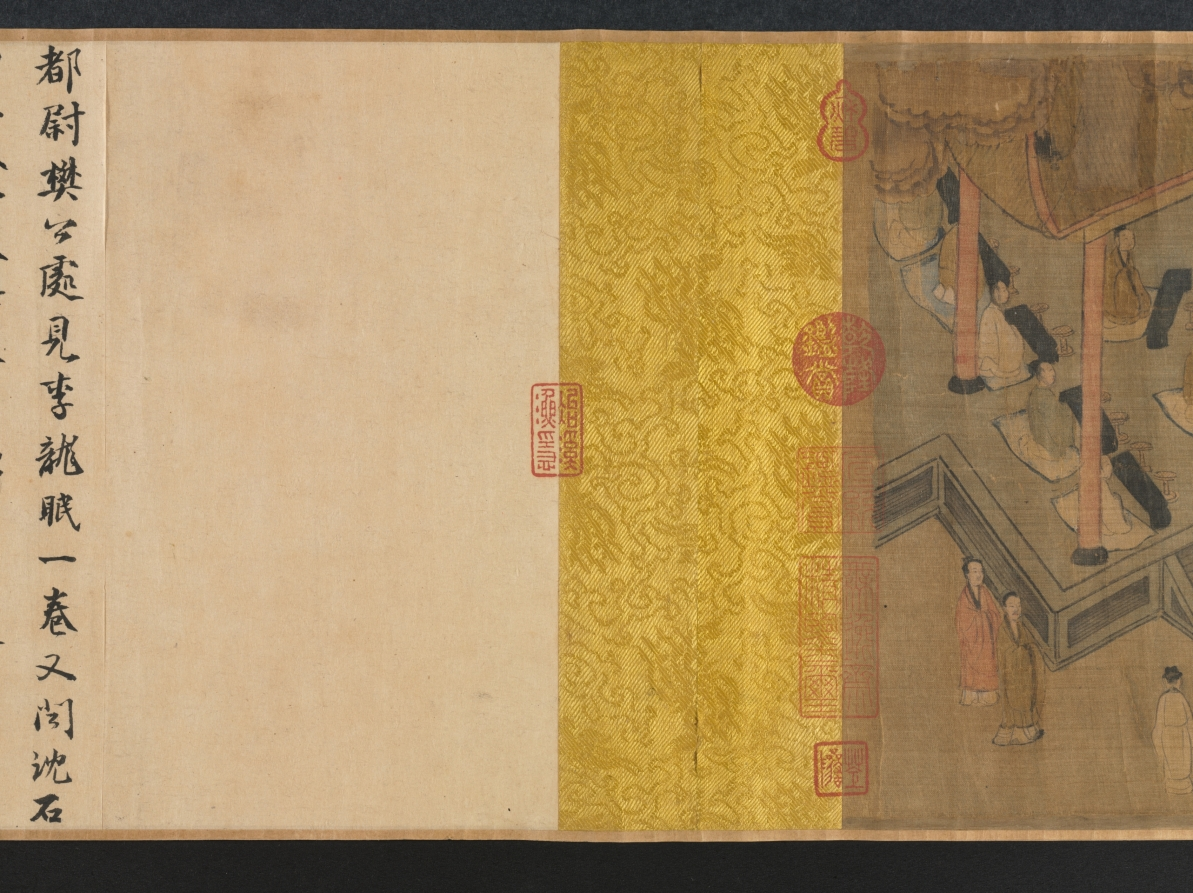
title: "Seventh Month" from the Odes of Bin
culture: China, Southern Song dynasty (1127-1279)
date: 1200s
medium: Handscroll; ink and color on silk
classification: Painting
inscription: Colophons: 1. [on the frontispiece] by the Qianlong emperor (dated 1741). 2. by Lu Wan (dated Zhengde dingchou, 1517). 2. by the Jiaqing emperor (dated 1807).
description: According to Confucian thought, the ruler looks after the well-being of his people which involves agricultural activities. Seventh Month from the ancient Odes of Bin in the Shijing (Book of Poetry) describes occupations throughout the year, including plowing, harvesting, hunting, making clothes, and observing rituals. The earliest illustrations of these Odes accompanied by text were commissioned by Southern Song emperor Gaozong (reigned 1127–1162). As the lower Yangzi delta had become the new seat of government, Gaozong had sets of these illustrations produced by court artists to revive the dynasty and convince the Confucian officialelite of his legitimacy to rule.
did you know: The Odes of Bin appears in the classic Shijing (Book of Poetry), an anthology of more than 300 poems, folk songs, and ceremonial hymns that were originally chanted to music.